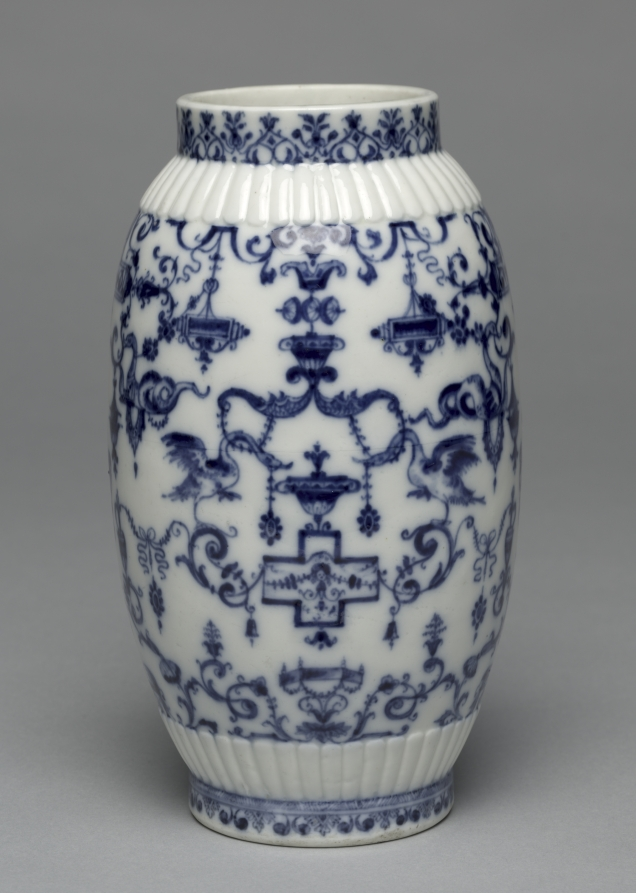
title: Vase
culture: France, St. Cloud, late 17th-early 18th Century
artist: attributed to Saint Cloud Porcelain Factory (French)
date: c. 1695–1700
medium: Molded soft-paste porcelain with blue underglaze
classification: Ceramic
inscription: "55"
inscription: "KR paiz"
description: This vase’s decoration demonstrates the converging influence of Chinese and Italian art on French porcelain manufacture. Early production at the Saint-Cloud factory was inspired by blue and white Chinese porcelain. Books of grotesque designs popular during the Italian Renaissance and published by Jacques Androuet Du Cerceau provided models for this vase’s ornament including its interlacing garlands, swans, and snakes.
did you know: This vase may have been part of a garniture, a decorative set of matching porcelain intended to be displayed together.